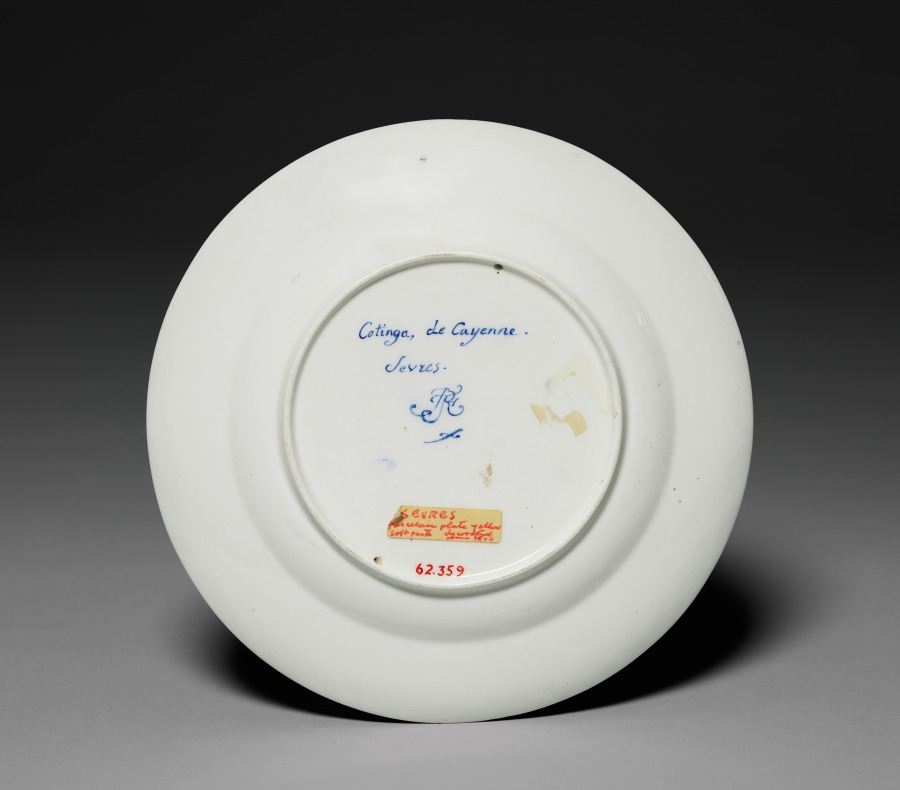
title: Plate (assiette unie)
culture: France, Sèvres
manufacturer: Sèvres Porcelain Factory (French, est. 1756)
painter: Etienne Evans (French, 1733–1806)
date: c. 1794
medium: Soft paste porcelain with enamel and gilt decoration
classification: Ceramic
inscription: [In blue, on bottom]: "CONTIGA, DE CAYENNE"; "Sevres RF"; [Painters mark of Étienne Evans (dagger)]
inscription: [Incised on bottom]: "B"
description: French naturalist Georges-Louis Leclerc’s The Natural History of Birds provided models for bird painting in mid-18th-century France. Engravings in this book by François-Nicolas Marinet likely inspired the bird painted on this plate. These popular representations responded to a growing 18th-century French interest in biologically accurate representations of the natural world.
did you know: Identified on the back of the plate as Cotinga, du Cayenne, the bird represented is a spangled continga, a species found in the Amazon rainforest.